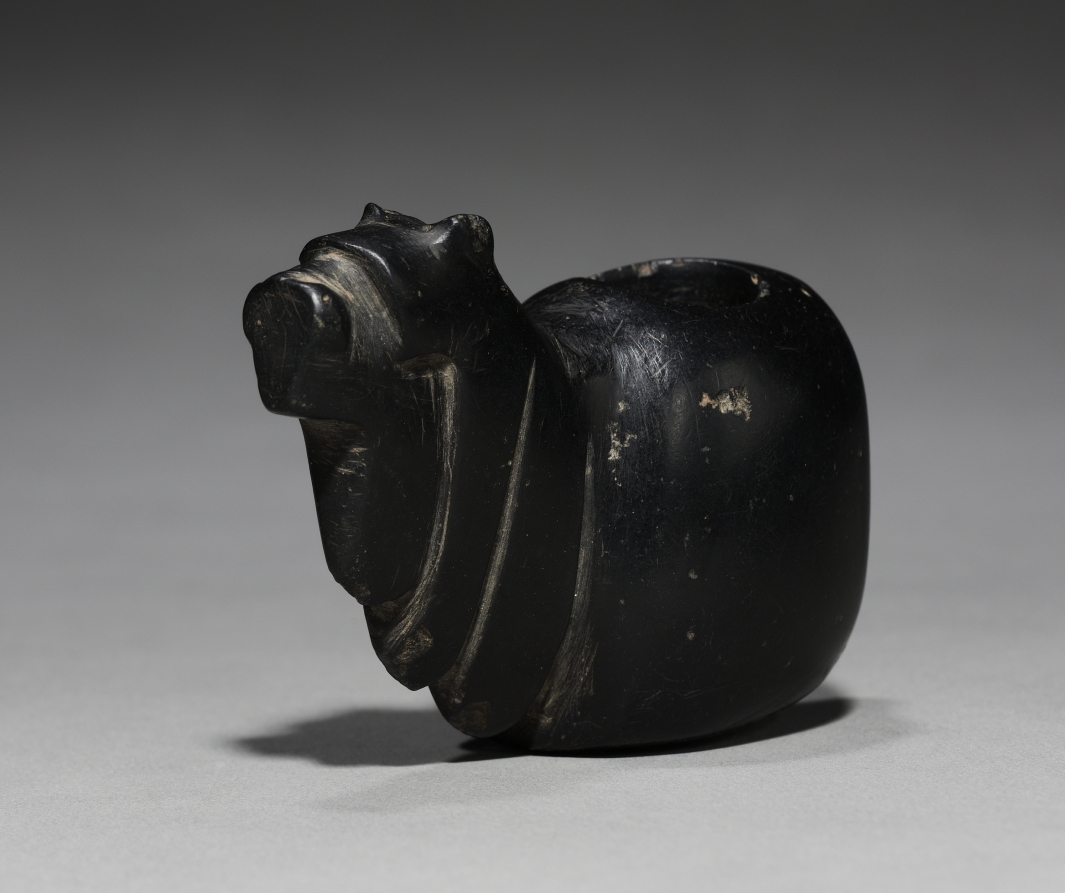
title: Alpaca Offering Container (Canopa)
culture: Peru, Inka style (1400-1532)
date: 1400–1532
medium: stone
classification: Stone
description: An unknown substance was placed in the back cavity of this alpaca before it was buried as an offering.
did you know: This stone llama was an offering buried to ensure health and fertility for domestic animals.